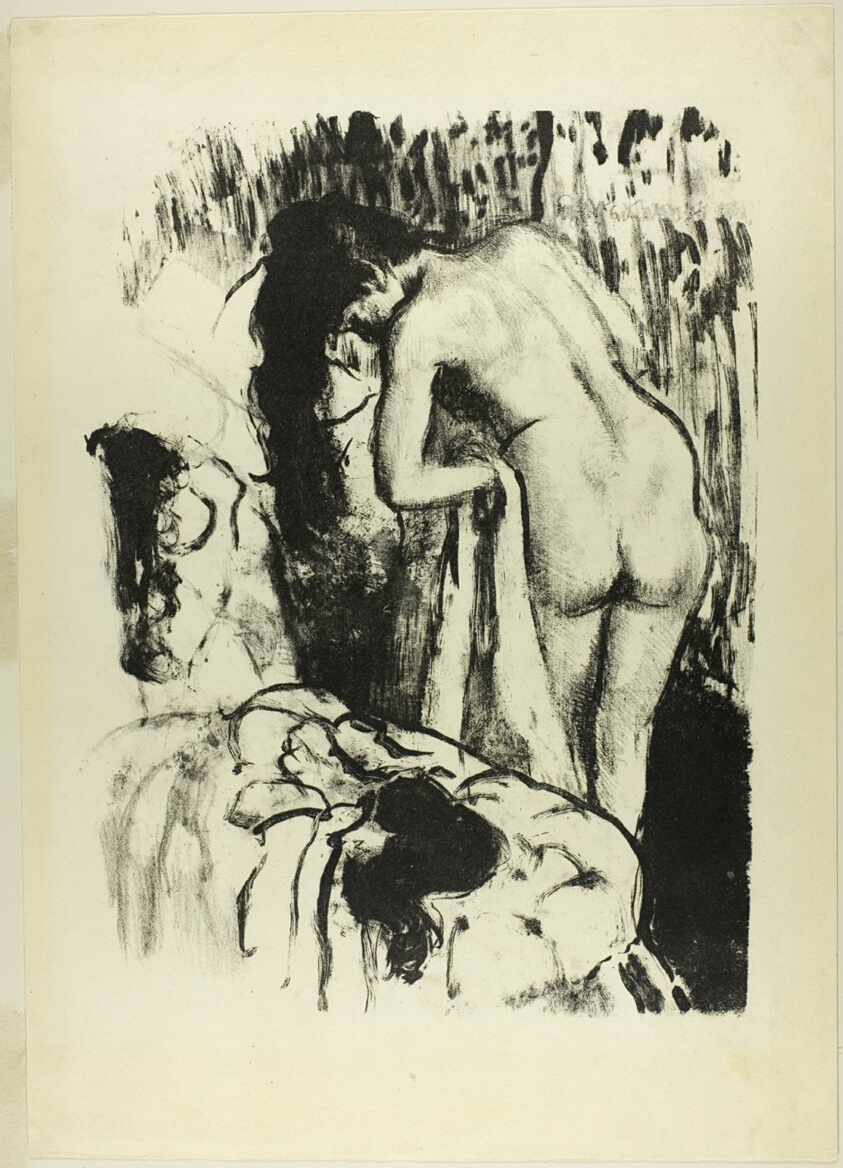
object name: Print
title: Nude Woman Standing, Drying Herself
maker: Edgar Degas; French, 1834-1917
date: 1891–92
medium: Transfer lithograph on ivory wove paper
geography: France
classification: print; prints and drawing; lithograph; paper